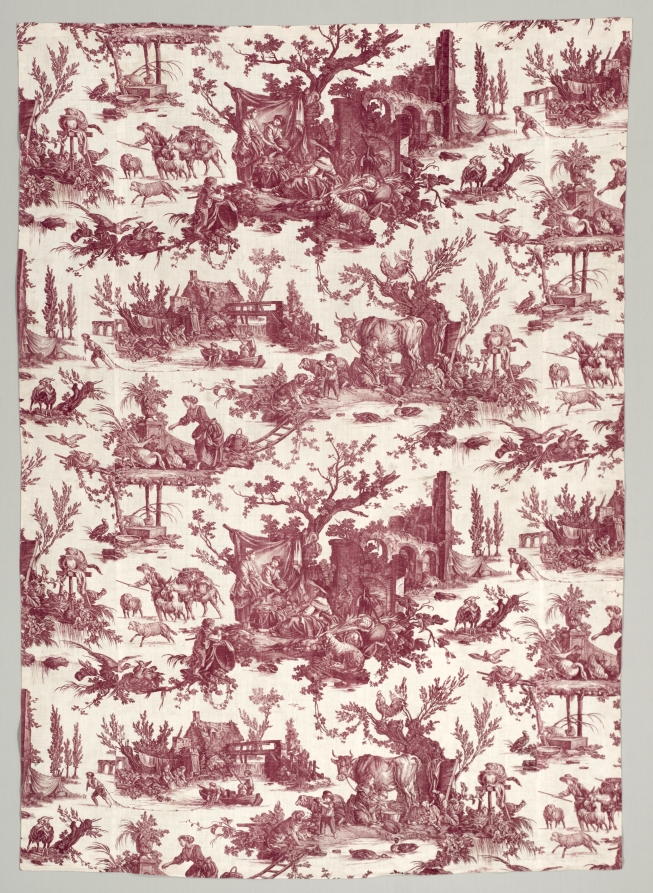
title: Strip of Copperplate Printed Cotton with "Les plaisirs de la ferme" Design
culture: France, 18th century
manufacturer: firm of Christophe Philippe Oberkampf (French, 1738–1815)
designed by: Jean-Baptiste Marie Hüet (French, 1745–1811)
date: 1785–1790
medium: copperplate printed cotton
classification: Textile